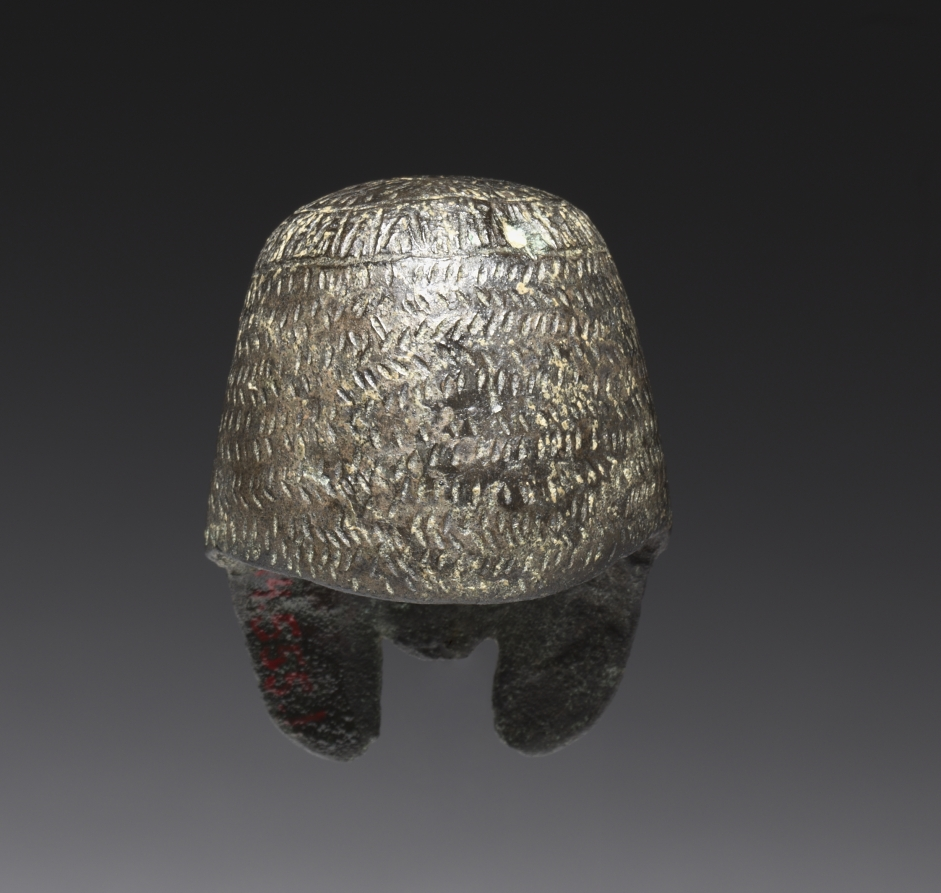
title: Bronze mount from a "Shawabty Bundle": Head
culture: Egypt, Thebes, Wadi Qubbanet el-Qirud, New Kingdom (1540–1069 BCE), Dynasties 18–19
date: c. 1336–1256 BCE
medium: head; bronze face, black copper wig, with traces of gilding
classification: Funerary Equipment